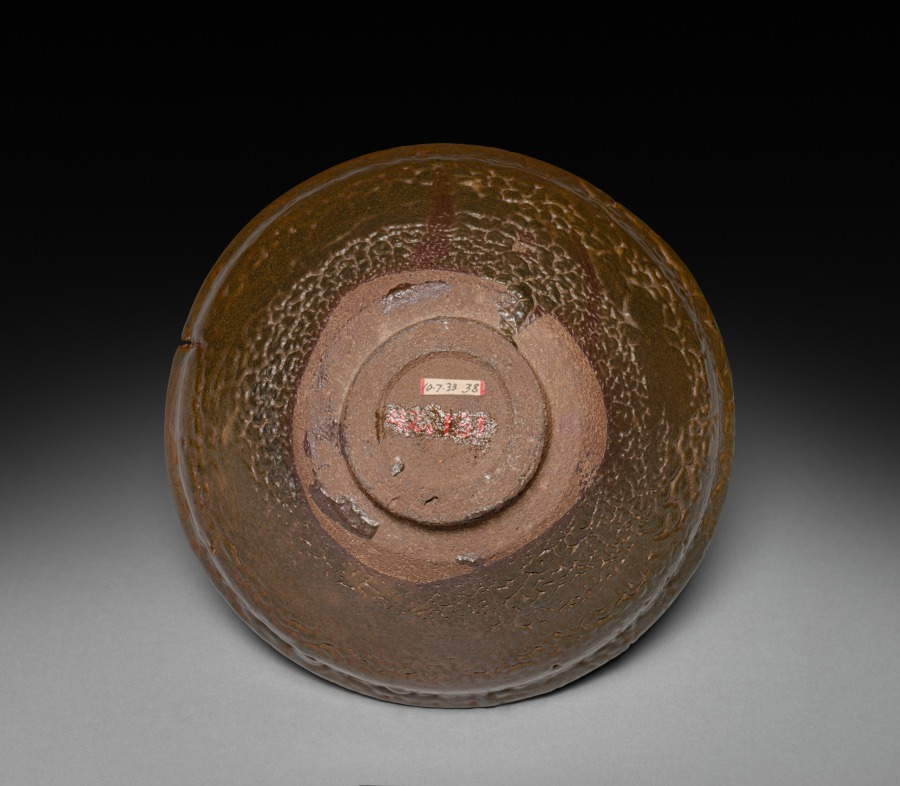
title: Tea Bowl: Jian ware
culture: China, near Shui ch'i, Song dynasty (960-1279)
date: 960–1279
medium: stoneware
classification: Ceramic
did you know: Jian ware was very popular with the tea cultures in China and Japan.